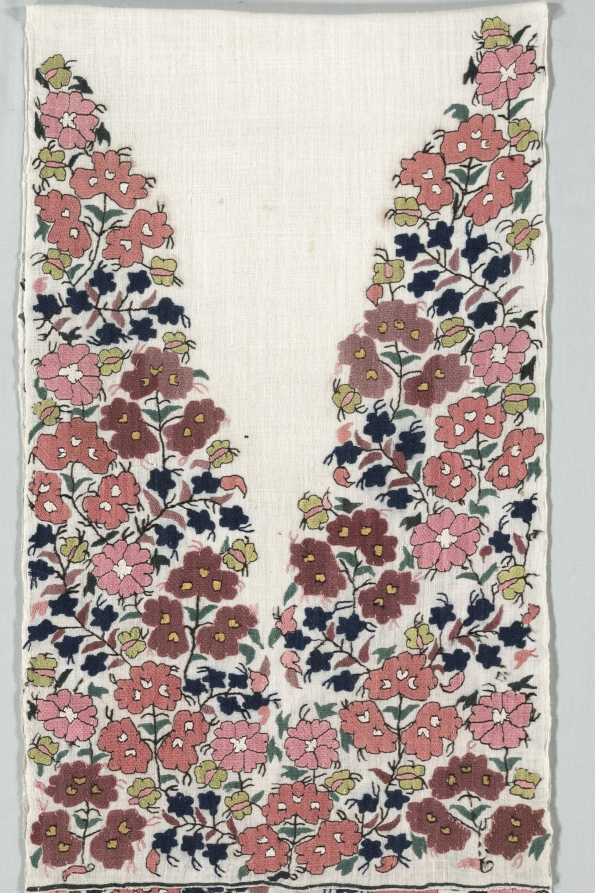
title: Scarf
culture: Africa, North Africa, Algeria, Algerian embroiderer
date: 1800s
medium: Linen, silk, dye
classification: Embroidery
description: This woven linen textile is embroidered with a cascading pattern of dusty pink, mauve, and navy blue flowers. The embroiderer created this design with dyed silk thread, outlining the shapes in black and then filling in the designs with dense stitches. Textiles with this composition were made across the Mediterranean Sea in the 1800s, and were used as scarves or towels.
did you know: This example was displayed in one of the CMA’s earliest exhibitions, 1923’s Eighteenth and Nineteenth Century Oriental Embroideries in 1923.